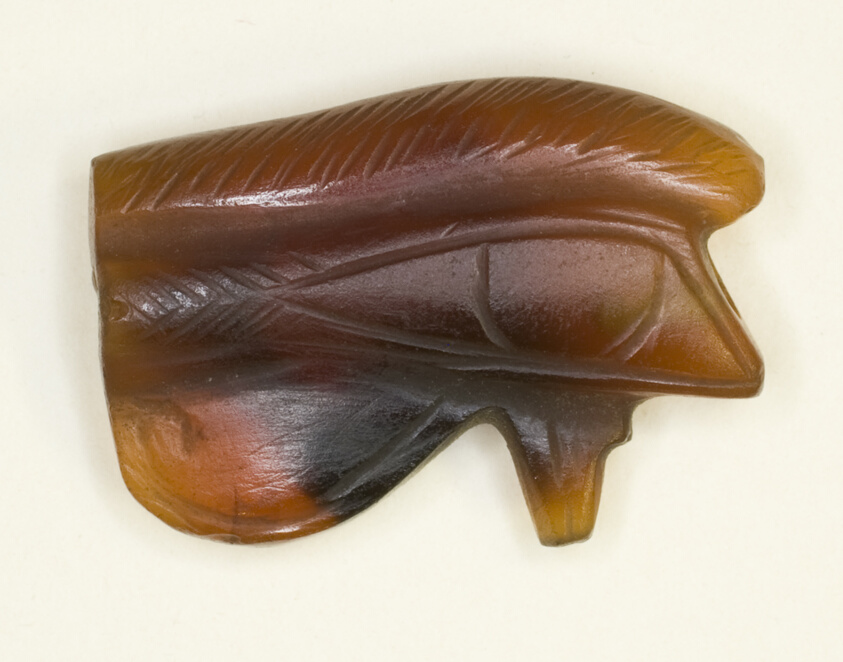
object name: Costume and Accessories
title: Eye of Horus (Wedjat) Amulet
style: egyptian, ancient, late period (egyptian), new kingdom, third intermediate period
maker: Egyptian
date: New Kingdom–Late Period (about 1550–664 BCE)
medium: Carnelian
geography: Egypt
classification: amulet; stone; jewelry; ancient art; costume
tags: eye of Horus